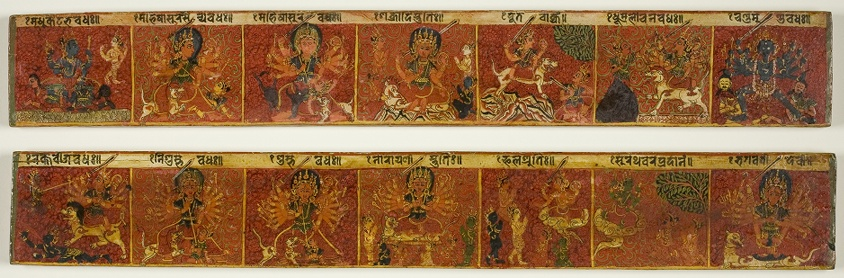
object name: Religious/Ritual Object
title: One of a Pair of Manuscript Covers from the Glorification of the Great Goddess (Devimahatmya)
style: Himalayan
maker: Nepal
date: late 17th century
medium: Pigments and metallic paint on wood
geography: Nepal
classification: ritual objects